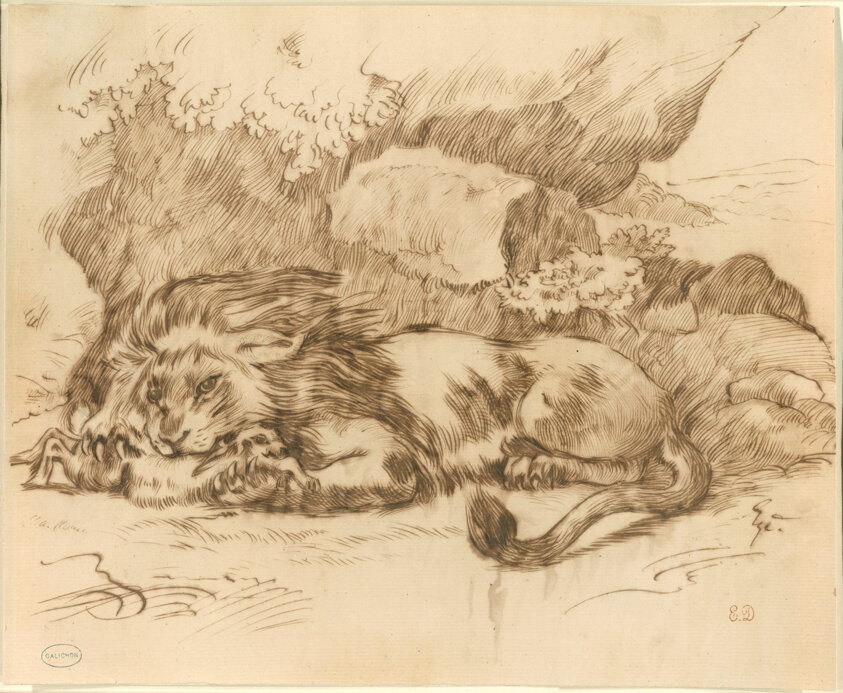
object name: Drawing and Watercolor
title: Lion Devouring a Rabbit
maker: Attributed to Eugène Delacroix; French, 1798–1863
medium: Pen and brown iron gall ink, over graphite, on ivory laid paper, laid down on ivory Japanese paper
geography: France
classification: prints and drawing; graphite; pen and ink drawings; drawings (visual works)